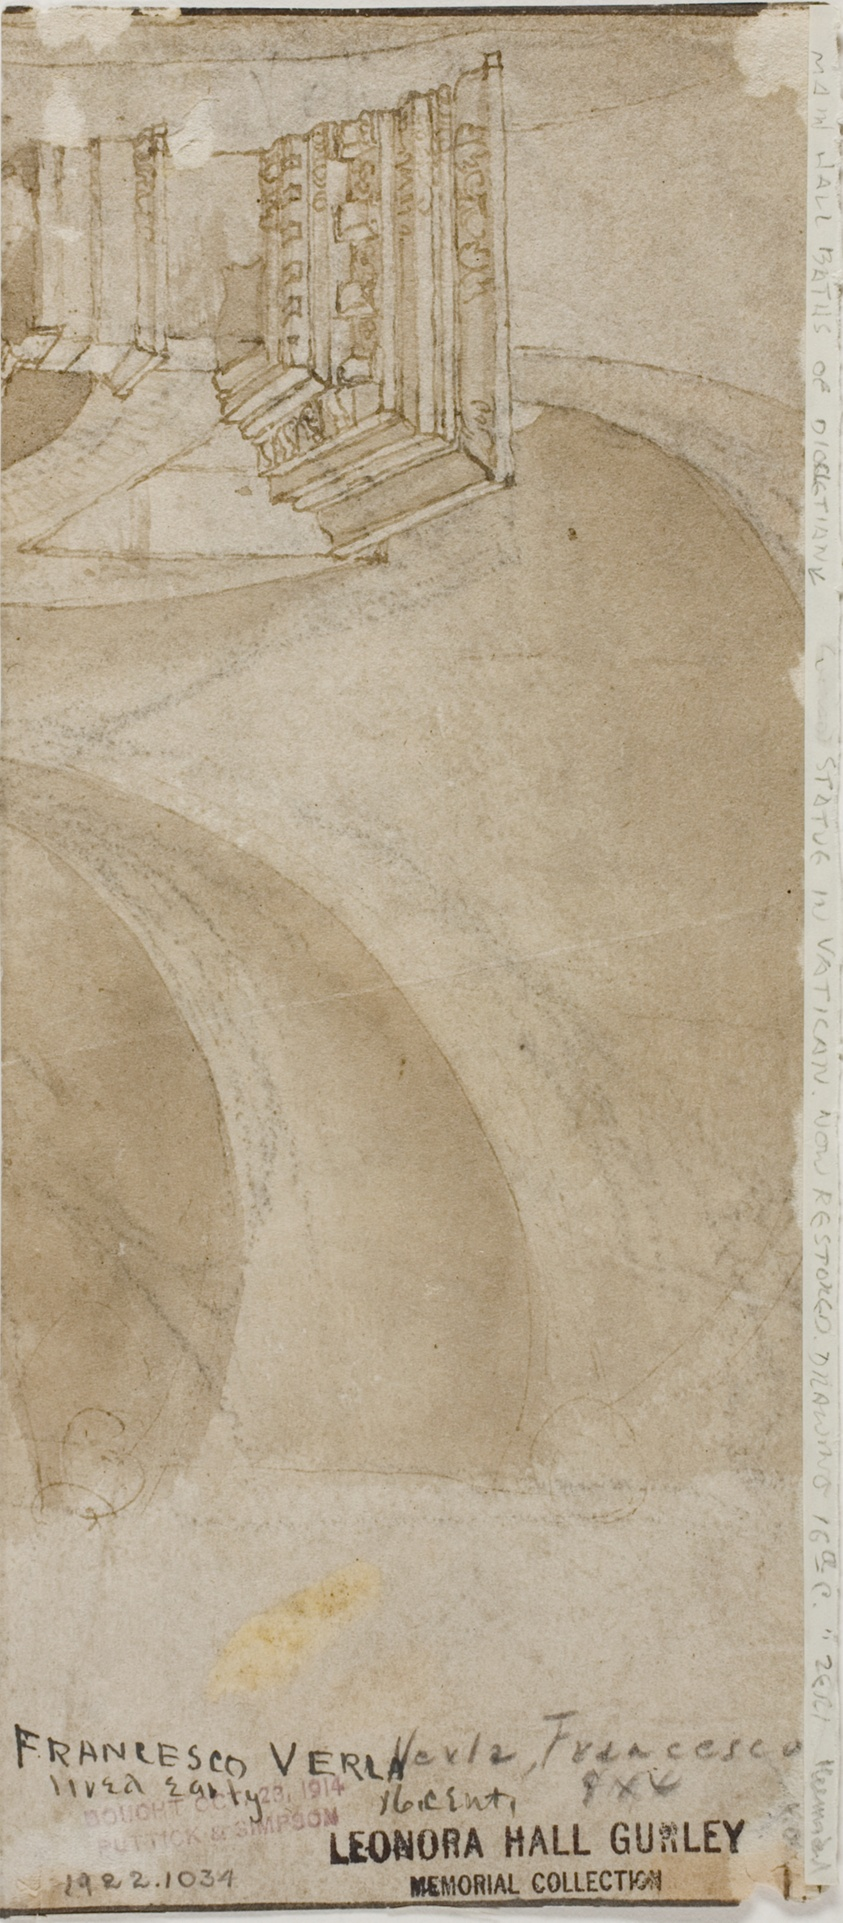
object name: Drawing and Watercolor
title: Celestial Venus (recto); Main Hall, Baths of Diocletian (verso)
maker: Circle of Maarten van Heemskerck; Netherlandish, 1498-1574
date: c. 1535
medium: Pen and brown ink (recto), and pen and brown ink, with brush and brown wash and black chalk (verso), on ivory laid paper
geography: Netherlands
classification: drawings (visual works); prints and drawing